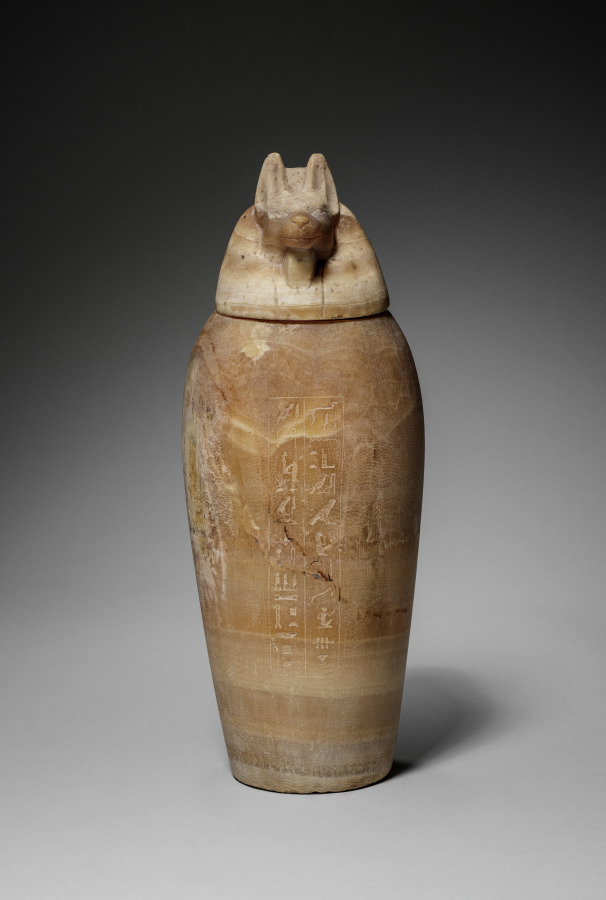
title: Canopic Jar with Jackal's Head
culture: Egypt, Late period (715–332 BCE), Dynasty 26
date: 664–525 BCE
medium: travertine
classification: Funerary Equipment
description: In the process of mummification, the liver, lungs, stomach, and intestines were removed, separately embalmed, and stored in specialized jars known as canopic jars (after a sailor in Greek mythology, who died at the town of Canopus in the Nile Delta and was worshipped there in the form of a human-headed jar). Each organ was identified with one of four funerary deities collectively known as the Sons of Horus: the liver with Imsety (man's head), the lungs with Hapy (baboon's head), the stomach with Duamutef (jackal's head), and the intestines with Qebehsenuef (falcon's head). It was their duty to protect the deceased and restore to him his body parts in the hereafter.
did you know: This jar is made of travertine stone-- subtle in color and with a captivating natural pattern-- with hieroglyphics carved on the front. Such jars were used to hold internal organs of the deceased and to preserve them for the afterlife.